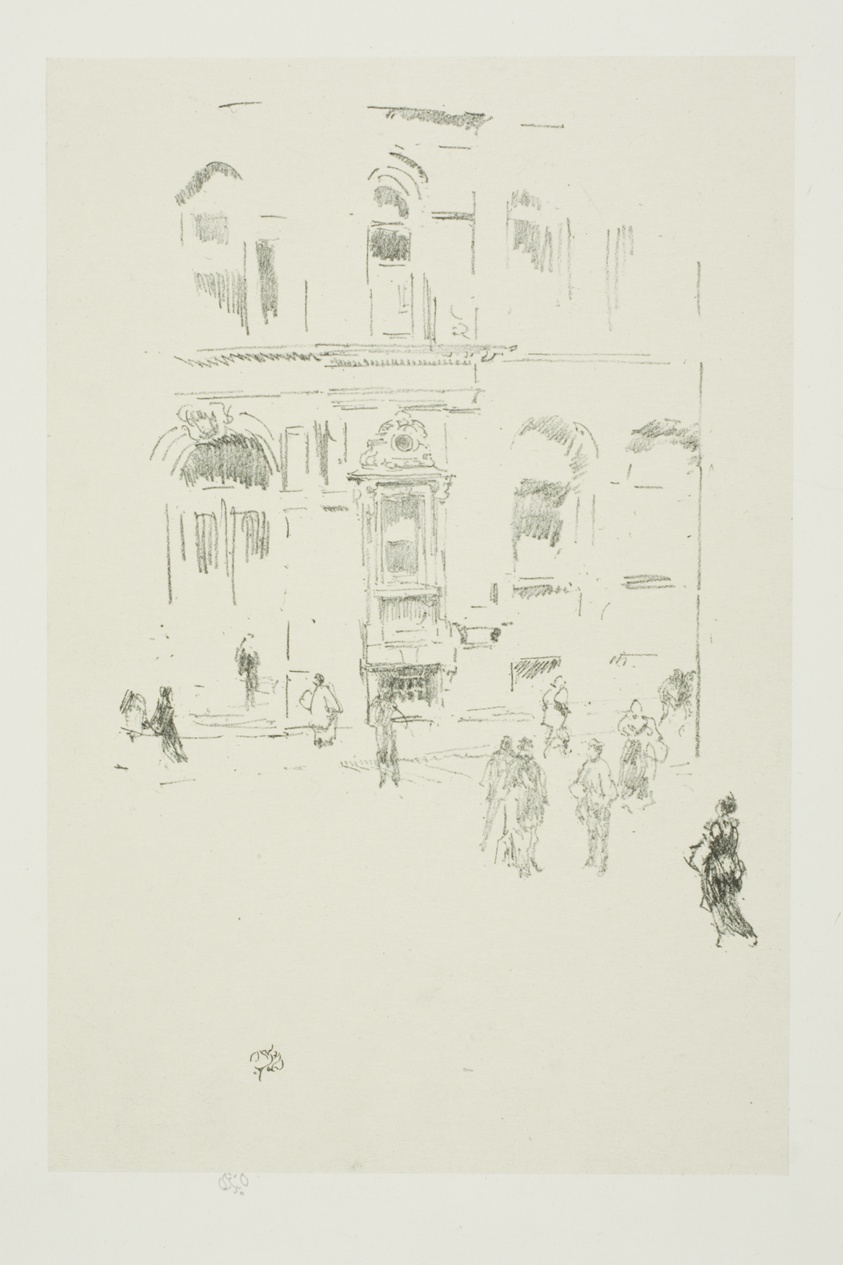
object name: Print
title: Victoria Club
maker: James McNeill Whistler (American, 1834-1903)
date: 1879/87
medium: Transfer lithograph in black with scraping, on cream chine laid down on ivory plate paper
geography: United States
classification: transfer lithograph; lithograph; print; prints and drawing; paper